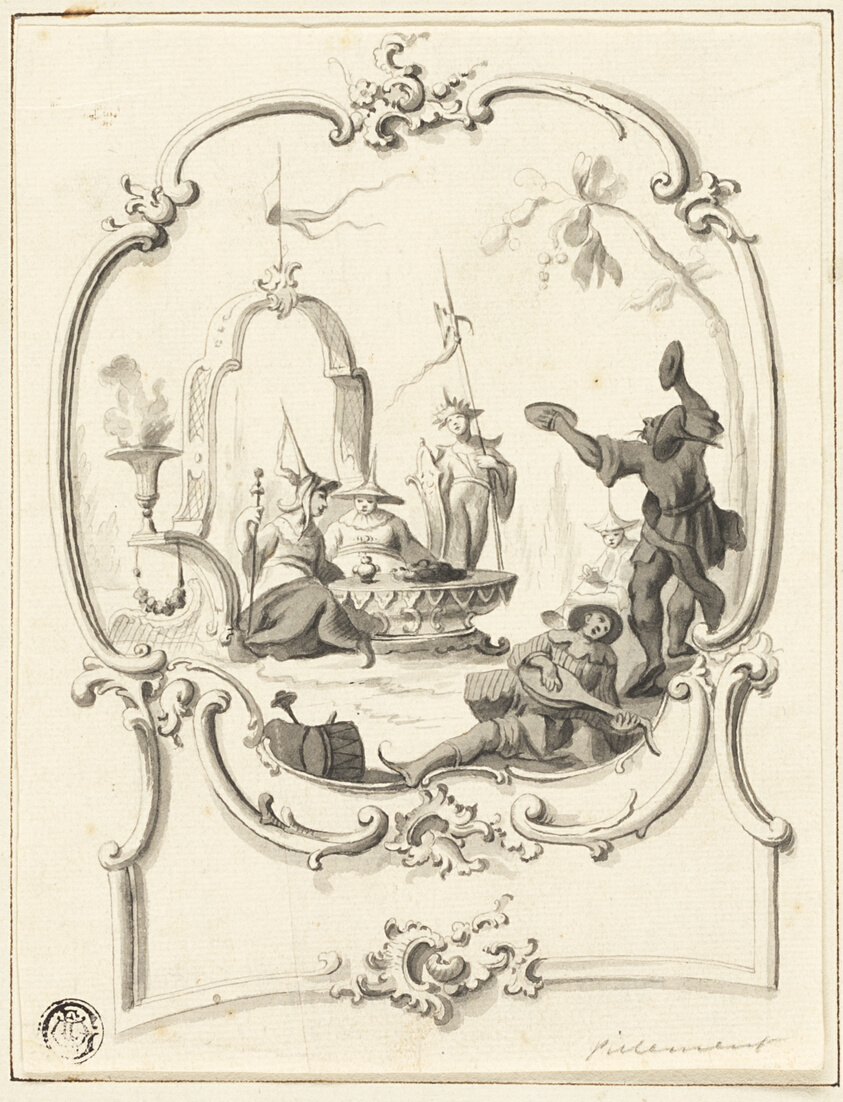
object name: Drawing and Watercolor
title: Chinoiserie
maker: Jean Baptiste Pillement (French, 1728-1808)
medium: Pen and black ink, with brush and black wash, on ivory laid paper, tipped onto ivory laid paper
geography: France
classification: pen and ink drawings; paper; drawings (visual works); prints and drawing